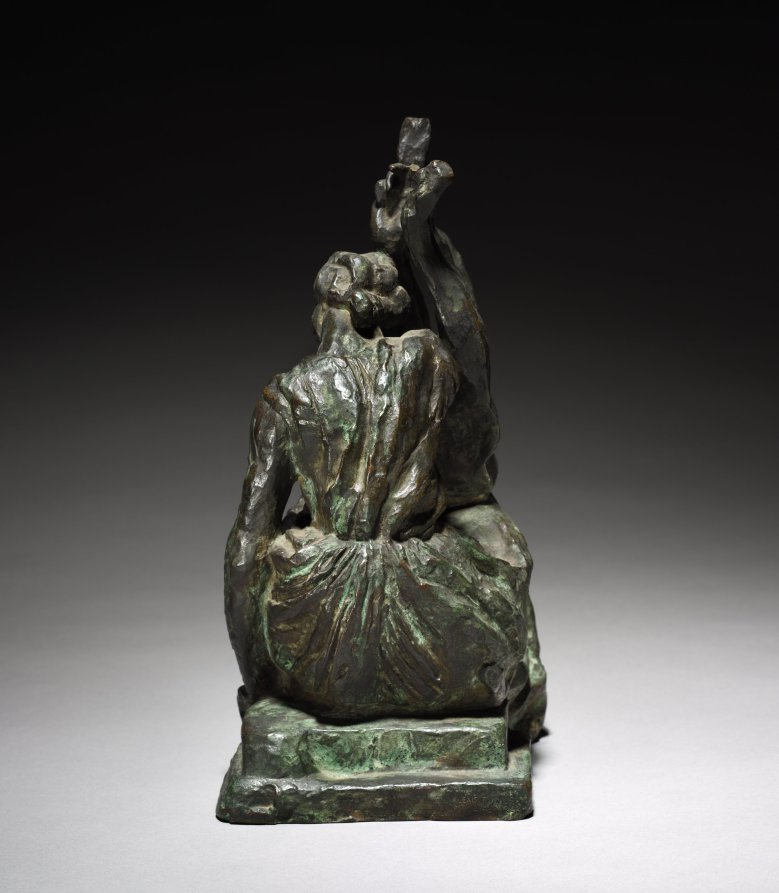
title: Sappho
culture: France, 19th century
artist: Emile Antoine Bourdelle (French, 1861–1929)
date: 1887–1925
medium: bronze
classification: Sculpture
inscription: Inscribed on back: "Alexis Rudier, Fondeur, Paris"; on right side: "E. A. Bourdelle"